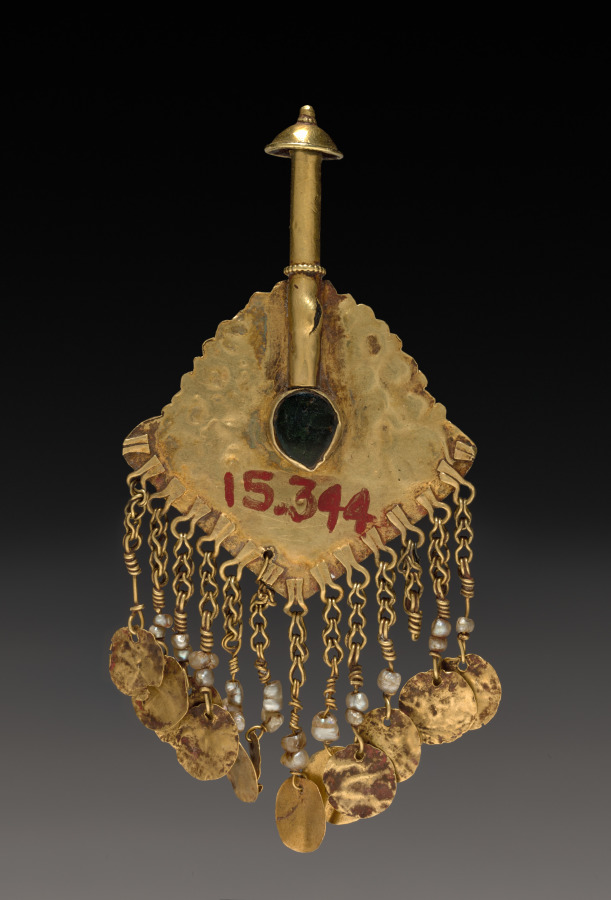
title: Ornament in the Shape of a Peacock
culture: Nepal, Kathmandu Valley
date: 1600s-1700s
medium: gold with jewels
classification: Jewelry